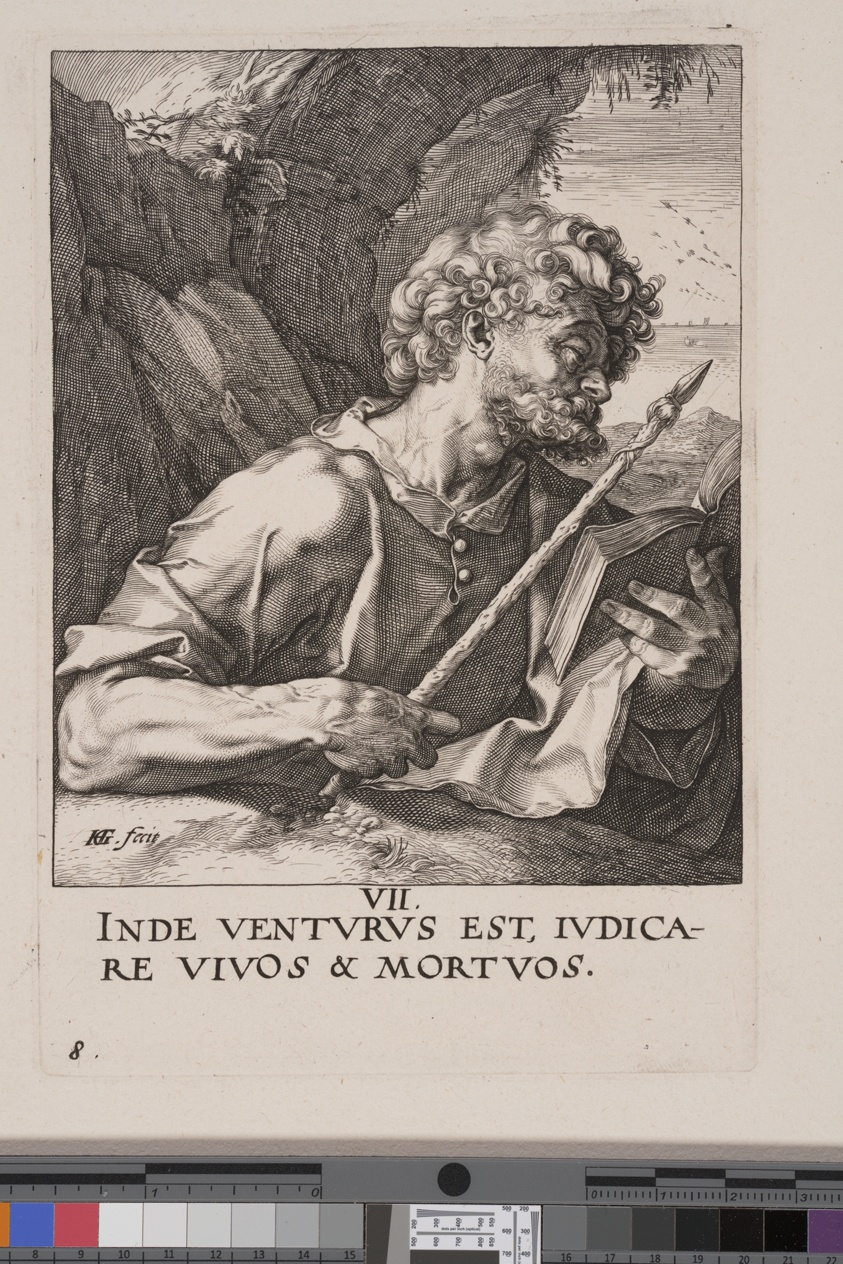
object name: Print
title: St Thomas, from Christ, the Apostles and St Paul with the Creed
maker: Hendrick Goltzius (Dutch, 1558–1617)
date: 1589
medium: Engraving on ivory laid paper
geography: Netherlands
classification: print; paper; prints and drawing; engraving